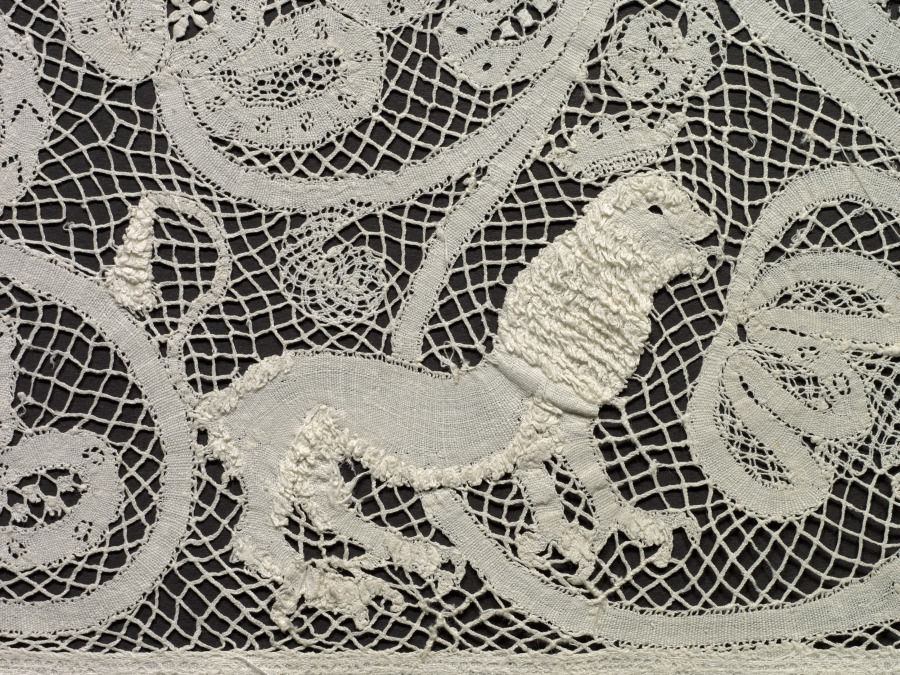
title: Lace Flounce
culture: Italy, Milan(?)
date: 1750–99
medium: Linen: bobbin lace (Punto di Milano)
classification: Lace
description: Being the most prestigious material, lace was used extensively by the 1600s for altar linen and for trimming priest’s albs, often incorporating finely rendered religious images amid blossoming vines. This alb flounce depicts scenes from the Old Testament story of Joseph, whose jealous brothers sold him to a caravan bound for Egypt. Joseph later interpreted dreams of the pharaoh, who made him ruler. When famine in Canaan caused Joseph’s ten brothers to travel to Egypt in search of food, they bowed down to him. After he revealed his identity, he forgave his brothers and God saved the family.